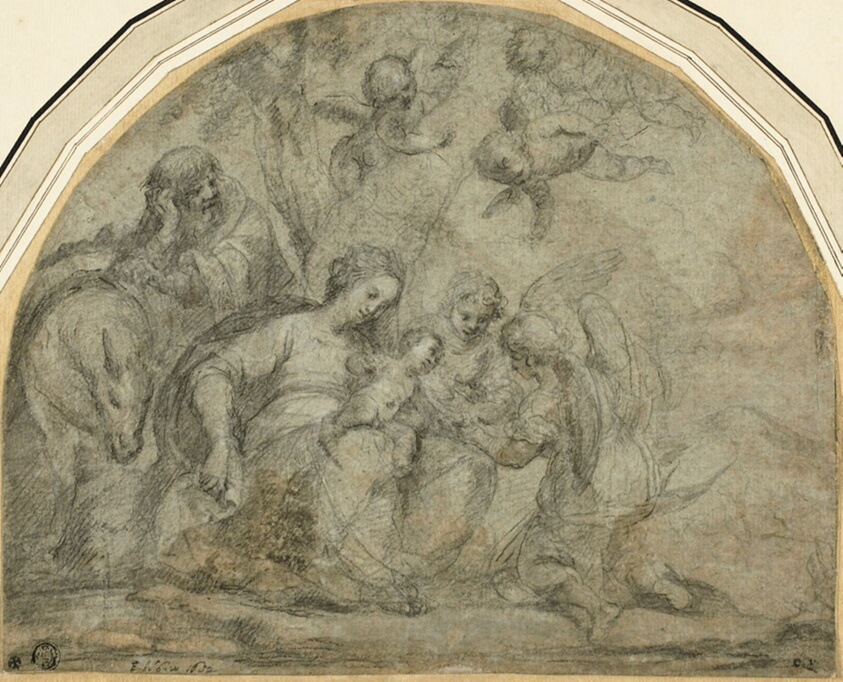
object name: Drawing and Watercolor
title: Rest on the Flight into Egypt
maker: Francesco Albani (Italian, 1578-1660)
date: 1657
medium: Black chalk, with pen and brown and black ink and traces of red chalk, on blue-gray laid paper, laid down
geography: Italy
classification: graphite; drawings (visual works); prints and drawing